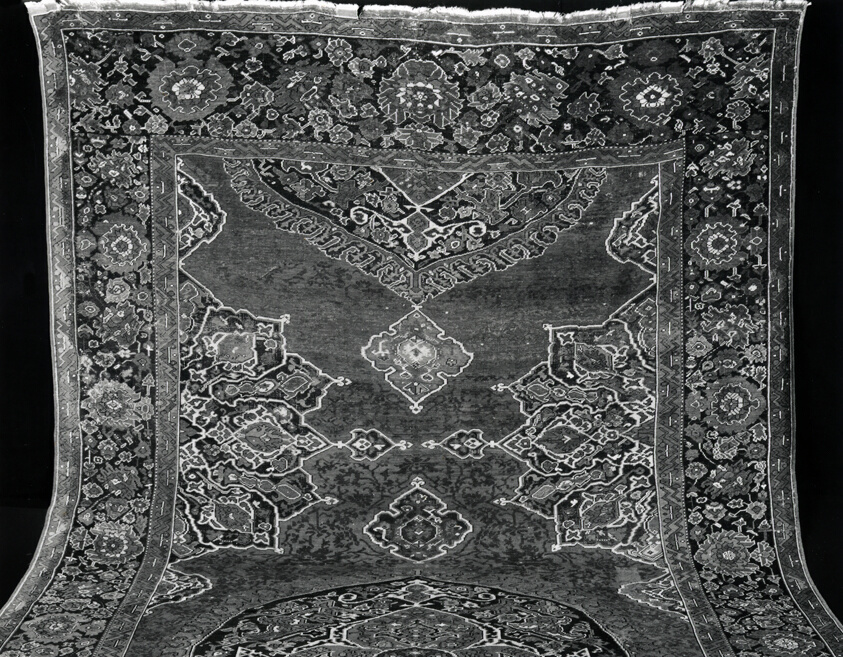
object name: Textile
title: Carpet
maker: Turkey, Anatolia, Ushak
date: 17th/18th century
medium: Wool, plain weave with supplementary wrapping wefts forming cut pile through a technique known as "Turkish" (Ghiordes) knots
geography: Turkey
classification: textile; weaving - carpet